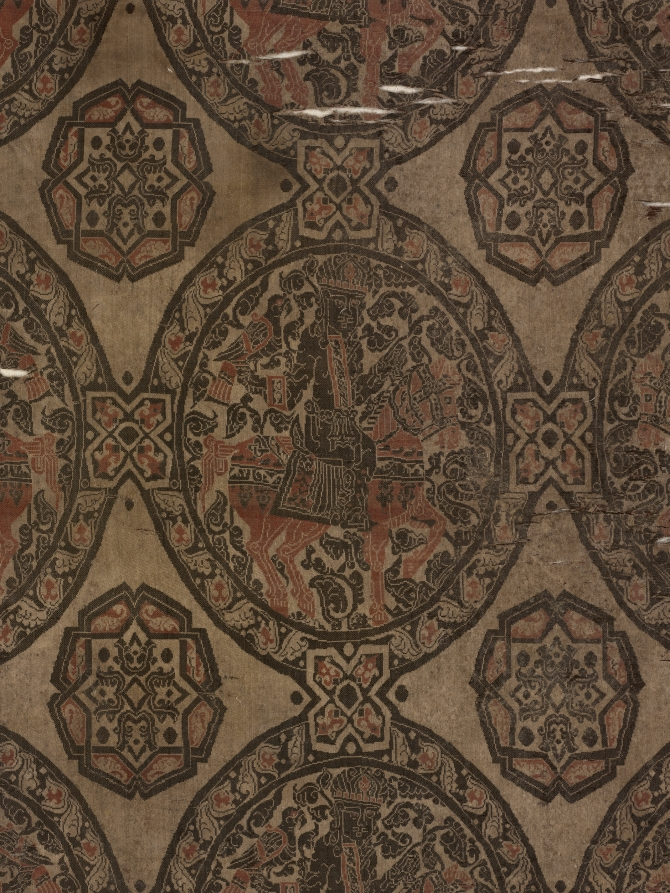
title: Fragment with Equestrian Falconer King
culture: Iran or Iraq, in the style of the Abbasid period (750–1258)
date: prior to 1971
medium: Silk: lampas weave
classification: Textile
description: In three rows, this fragment preserves nine complete aligned, tangent roundels, each containing a king on horseback with a falcon in his left hand and a leafy branch in his right. The border of each roundel is ornamented with a scrolling foliate vine. Interspaces contain oval medallions enclosing an eight-pointed star within which is a four-directional palmette. Joining the roundels at their cardinal points are cross-shaped geometric figures. According to recent analysis of the museum’s Buyid and Abbasid textile materials, some have been identified as modern reproductions.